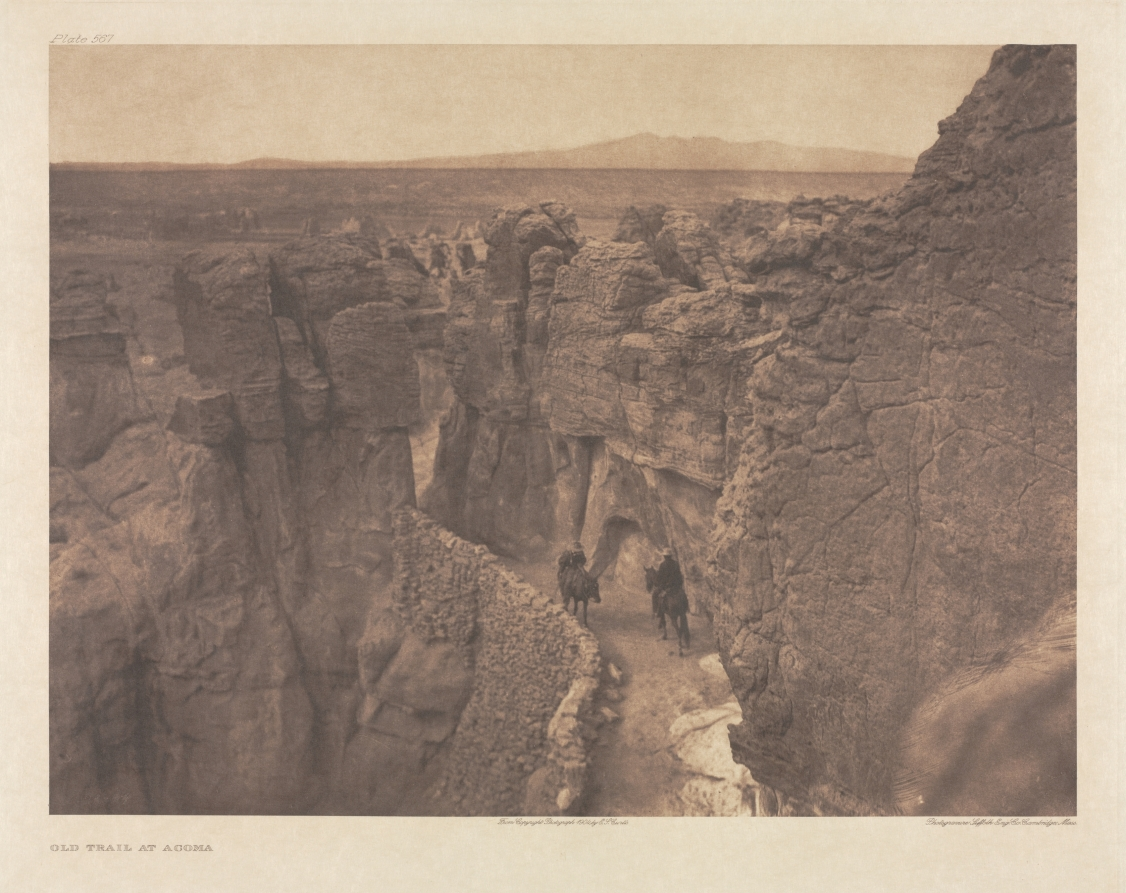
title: Portfolio XVI, Plate 567: Old Trail at Acoma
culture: America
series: The North American Indian: being a series of Portfolios picturing and describing the Indians of the United States, the Dominion of Canada, and Alaska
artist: Edward S. Curtis (American, 1868–1952)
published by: The University Press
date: 1904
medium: photogravure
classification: Portfolio